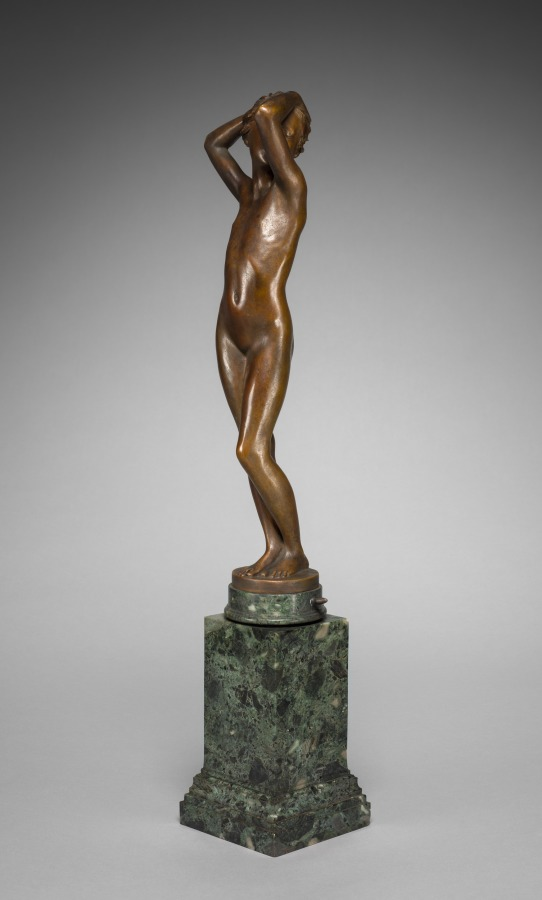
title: Eva, Study of a Nude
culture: America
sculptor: Emil Fuchs (American, born Austria, 1866–1929)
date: 1913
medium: bronze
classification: Sculpture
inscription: Signed on base: EMIL FUCHS 1913